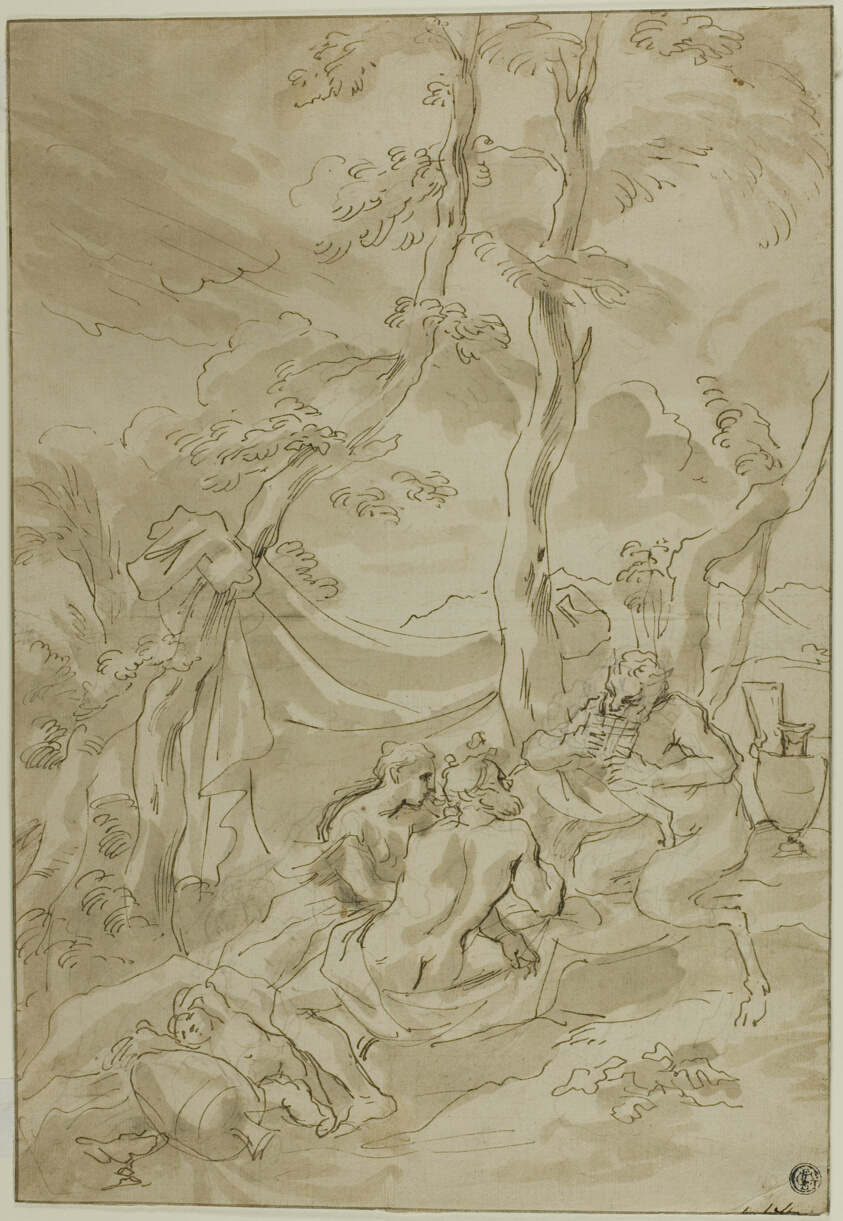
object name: Drawing and Watercolor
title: Bacchanale, with Satyr Playing Reeds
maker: Circle of Bartolomeo Biscaino (Italian, 1632-1657); or Pietro Testa (Italian, 1611/12-1650)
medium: Pen and brown ink, with brush and brown wash, over graphite, on ivory laid paper, laid down on buff laid paper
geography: Italy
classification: pen and ink drawings; drawings (visual works); prints and drawing